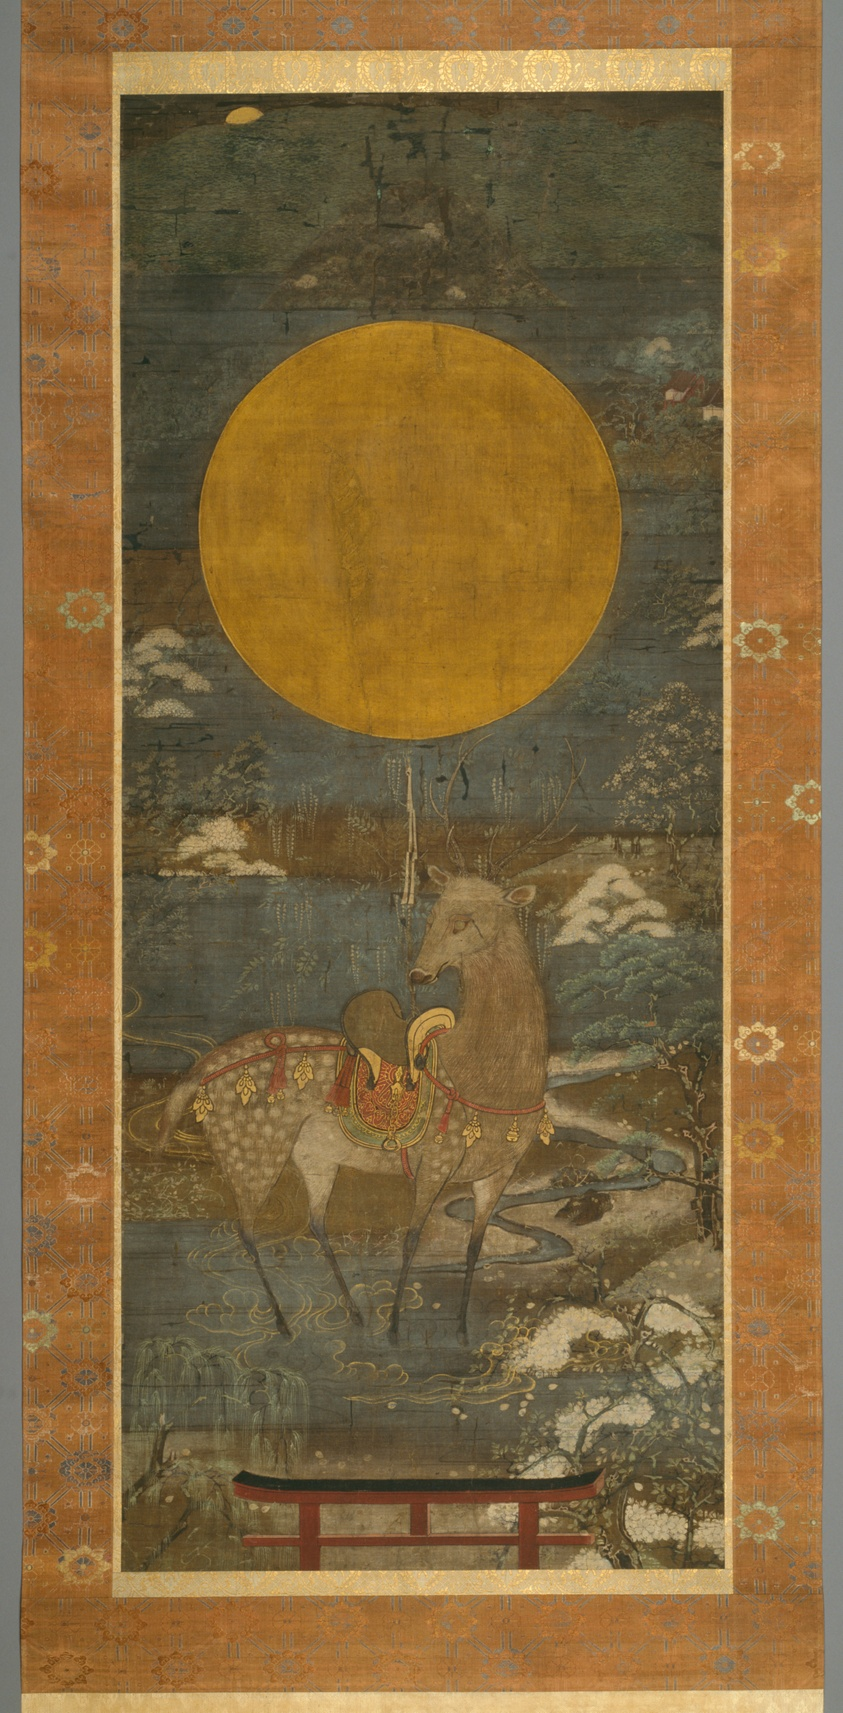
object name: Painting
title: Kasuga Deer Mandala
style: Japanese (culture or style)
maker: Artist unknown; Japanese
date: 15th century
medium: Ink, colors, and gold on silk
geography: Japan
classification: painting; asian art